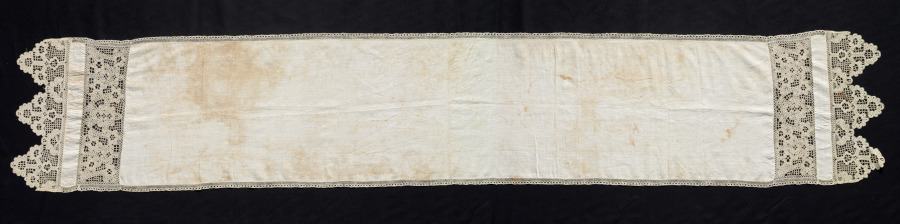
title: Towel with Lace Ends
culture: Russia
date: 1700s–1800s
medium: Straight (continuous) bobbin lace (Vologda Tape lace); figures and plant motifs formed with tape, outlined with gimp; plaited ground with picots links the tape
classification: Lace